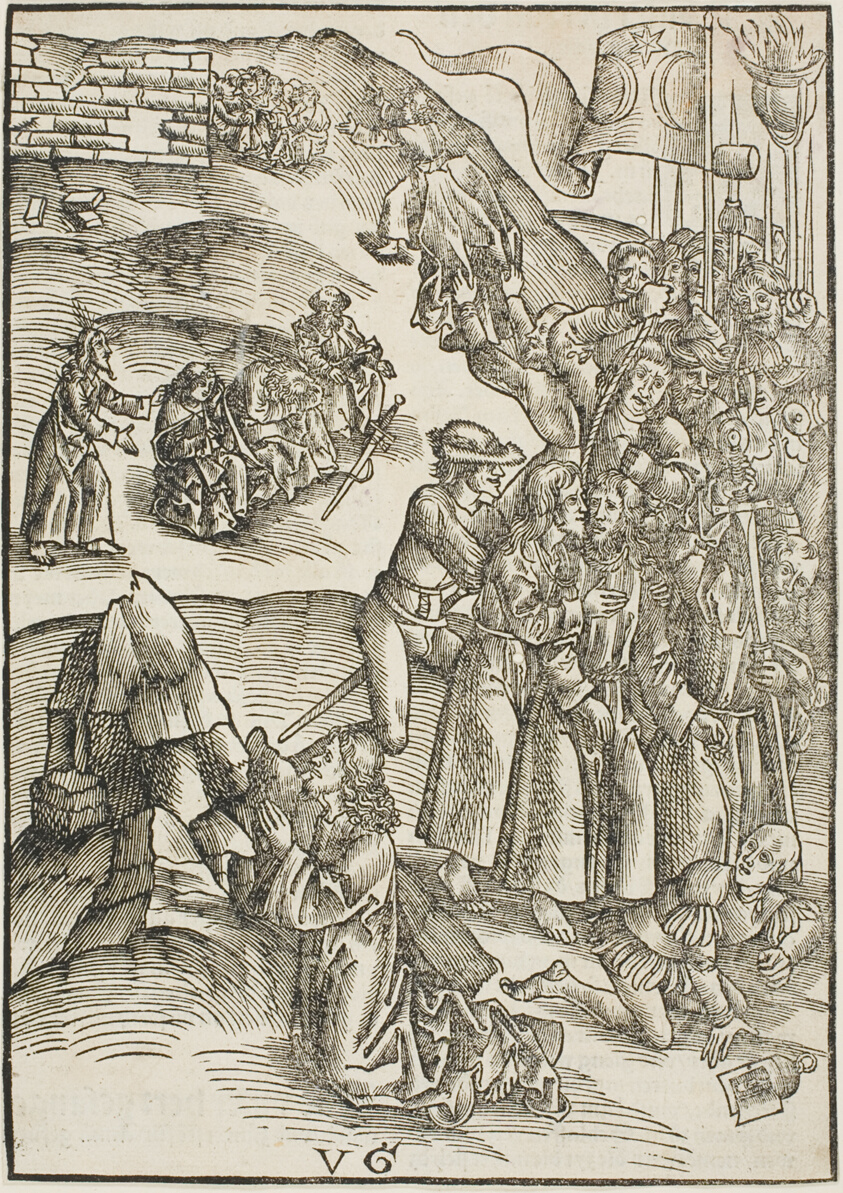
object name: Print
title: The Agony in the Gardens and Christ's Arrest, plate ten from Passio domini nostri Jesu Christi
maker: Urs Graf, the Elder (Swiss, 1485-1527/28); published by Johann Knobloch (German, born Switzerland, died 1528)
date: c. 1503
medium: Woodcut on paper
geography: Switzerland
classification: woodcut; print; prints and drawing